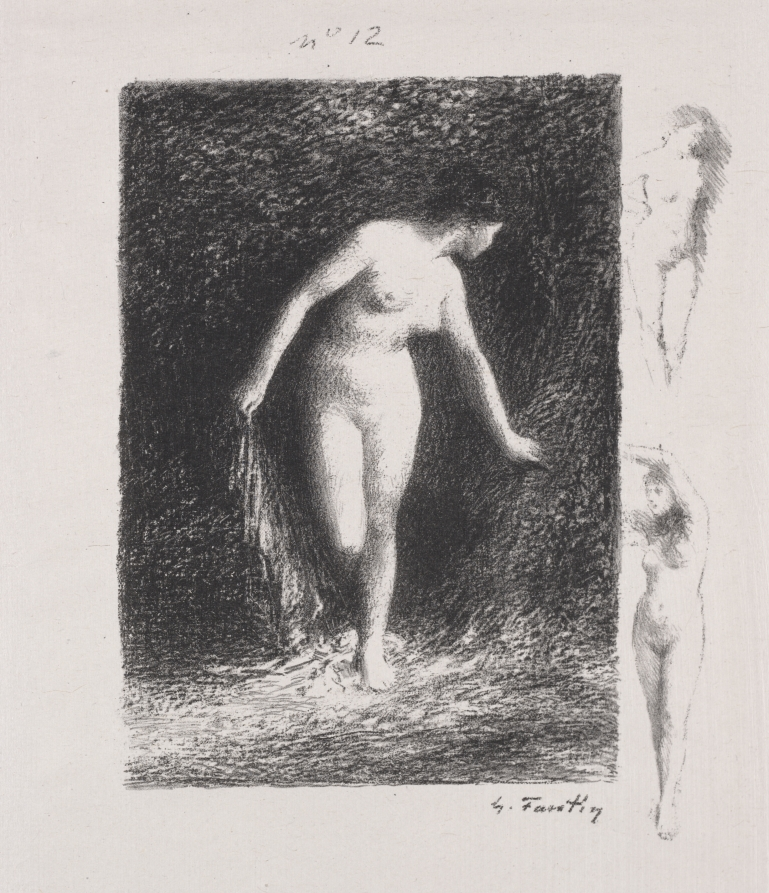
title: Diane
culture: France, early 20th Century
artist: Henri Fantin-Latour (French, 1836–1904)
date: 1903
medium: lithograph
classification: Print